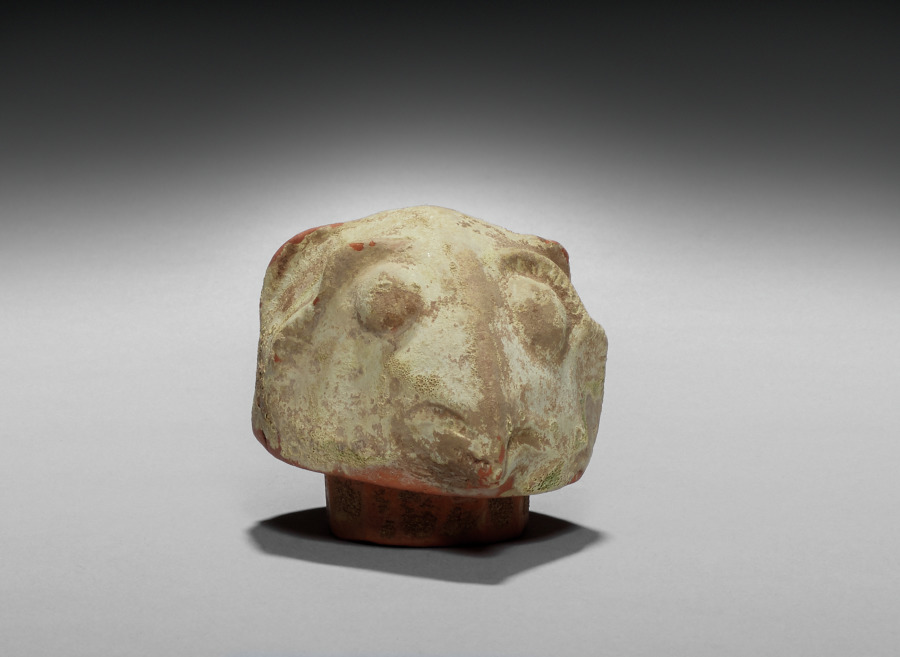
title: Owl-shaped Jar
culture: China, Henan province, Western Han dynasty (206 BCE–8 CE)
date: 206 BCE–9 CE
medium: Amber-brown glazed low-fired pottery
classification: Ceramic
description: Pottery vessels in the shape of owls were made since Neolithic times and throughout the Bronze age. These jars in the form of vigilant owls may have provided a tomb occupant with grain in the afterlife. However, the meaning of these mysterious birds and the association of the owl motif with burial sites in China is not fully understood.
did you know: The jar cover is modeled in the shape of an owl's head.